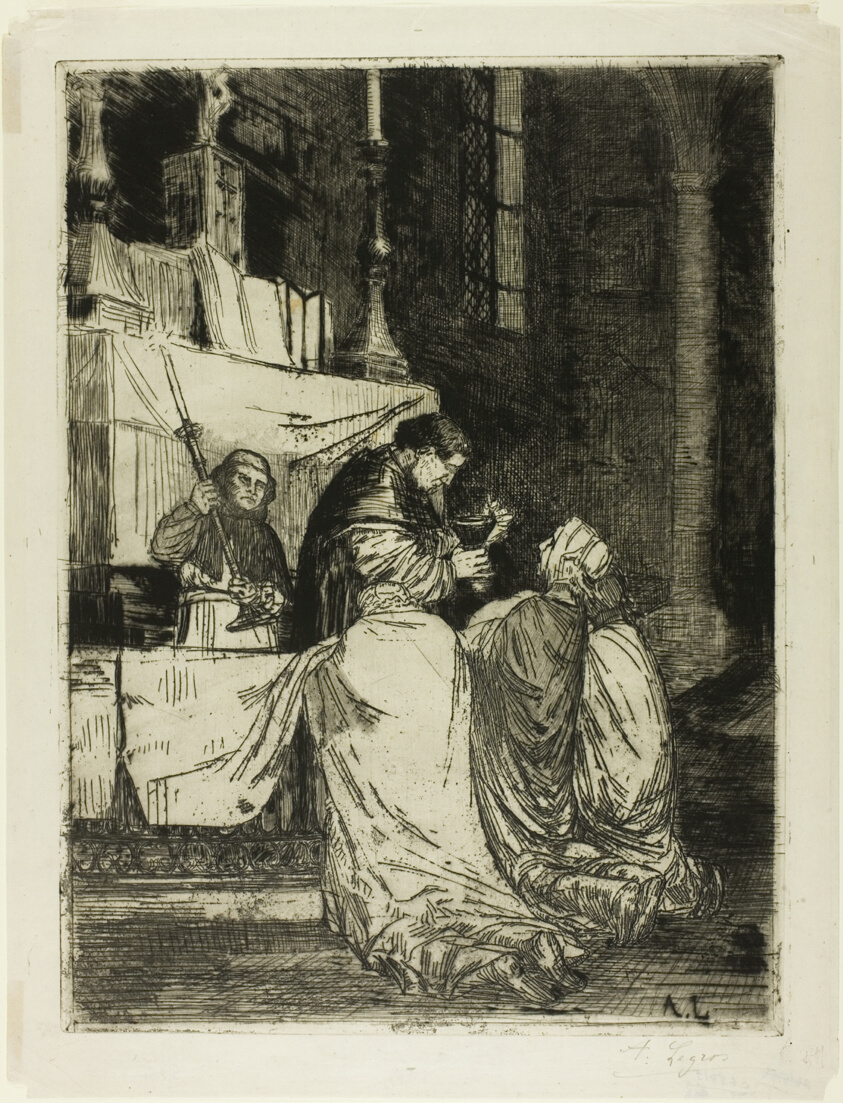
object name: Print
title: Communion in the Church of St. Médard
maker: Alphonse Legros (French, 1837-1911)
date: c. 1861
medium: Etching and drypoint on ivory chine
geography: France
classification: etching; print; prints and drawing